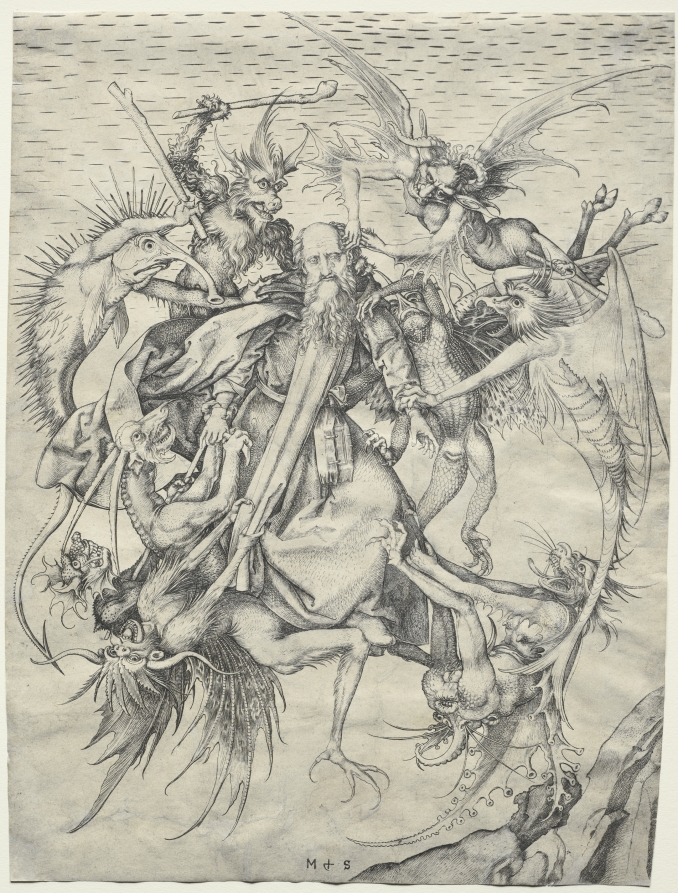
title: The Temptation of St. Anthony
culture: Germany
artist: Martin Schongauer (German, c. 1450–1491)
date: 1470–75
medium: engraving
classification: Print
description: Saint Anthony (c. AD 251–356) was an Egyptian hermit known for having established the ideal of monasticism, seclusion, and meditation in Christianity. According to the Life of Saint Anthony written by the 20th bishop of Alexandria Athanasius (c. AD 360), Anthony was assaulted by several demons and tormented by erotic visions during his retreat to the Eastern Desert of Egypt. Martin Schongauer's print marks the very moment in which a highly animated demonic attack took place in the sky. Nine whimsical monsters—composed of reptilian, mammalian, and fish- and bird-like parts—flap, blow, and grasp a stiff and indifferent Saint Anthony. With his firm discipline, the saint epitomizes the Christian's struggle to resist evil temptations.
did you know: Prints of Saint Anthony like this one were believed to function as protective tools against ergotism (also called St. Anthony's Fire), a disease causing painful putrefaction of the limbs cased by fungus found on rye.